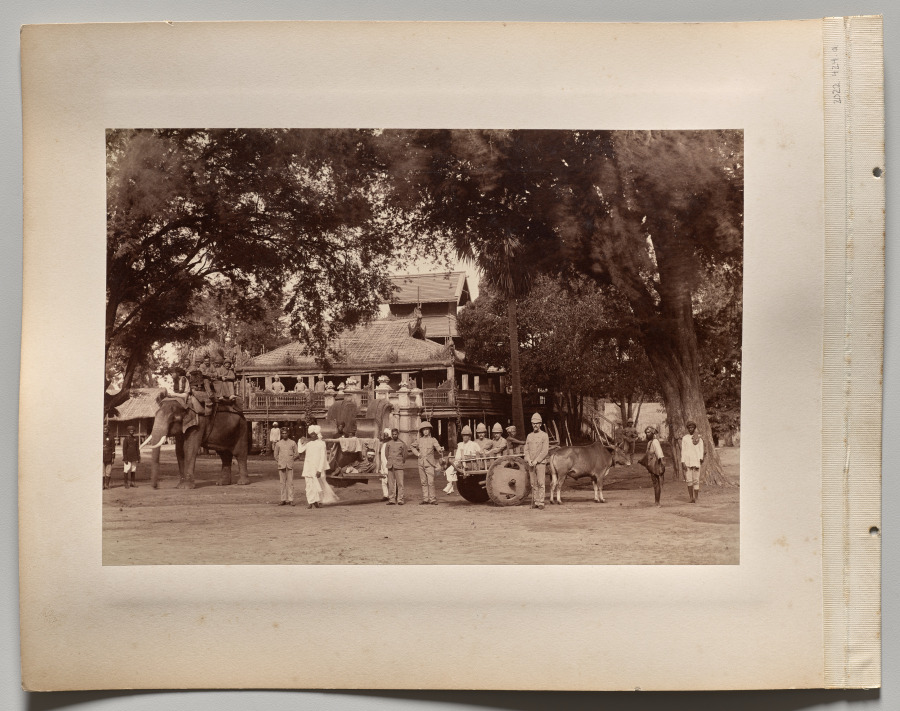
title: Untitled (British soldiers, man on palequin, and indgenous workers, recto)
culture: England, 19th century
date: 1870s-1880s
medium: albumen print mounted on an album page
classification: Photograph